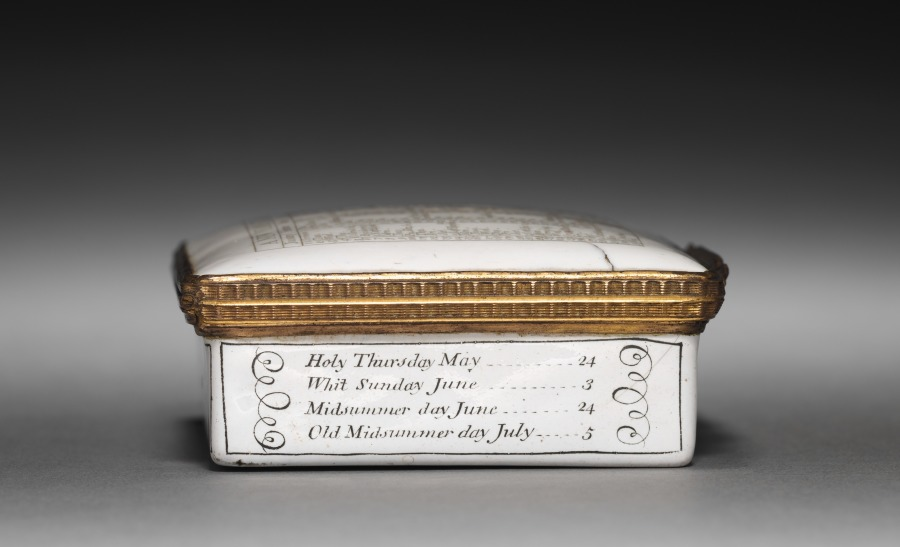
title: Snuff Box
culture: England, Birmingham, mid-18th Century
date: 1759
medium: enamel on copper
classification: Enamel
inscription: Dated: "1759"